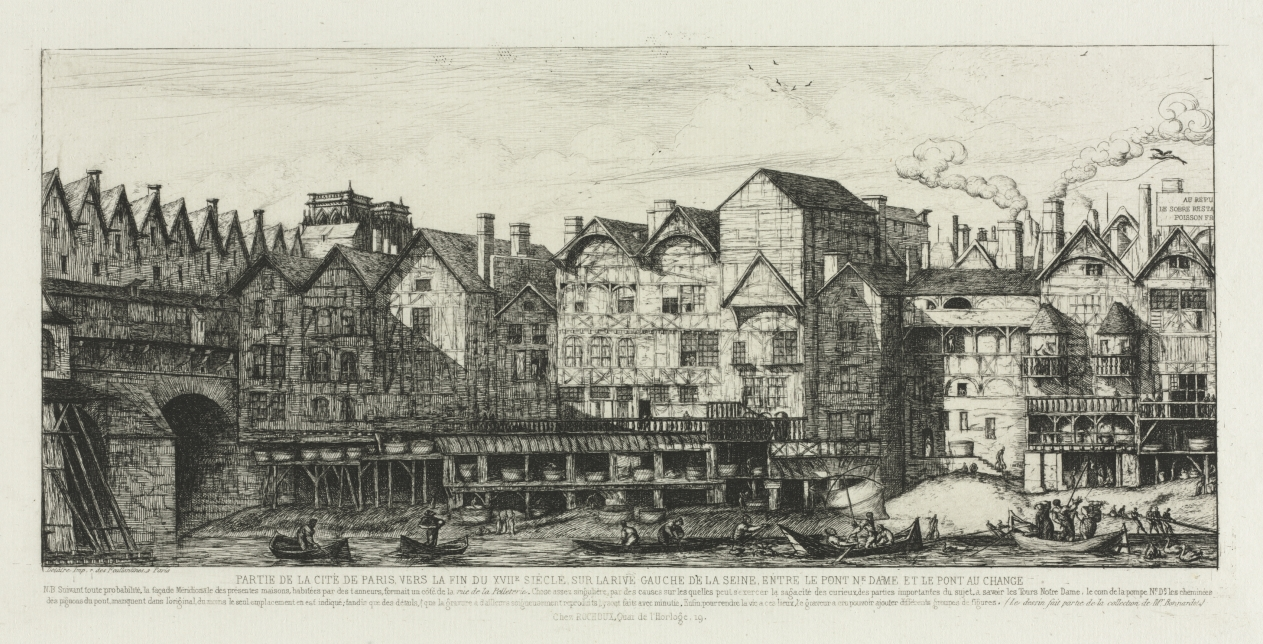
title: Part of the City of Paris at the End of the Seventeenth Century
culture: France, 19th century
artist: Charles Meryon (French, 1821–1868)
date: 1861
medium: etching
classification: Print